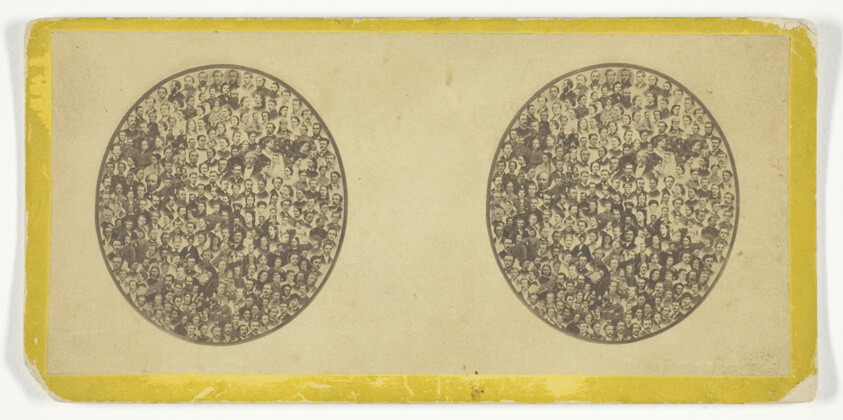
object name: Photograph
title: Untitled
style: 19th century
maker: Daniel S. Camp (American, active late 19th century)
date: Late 19th century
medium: Albumen print, stereo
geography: United States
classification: photography; photograph; albumen silver print; stereograph (albumen)